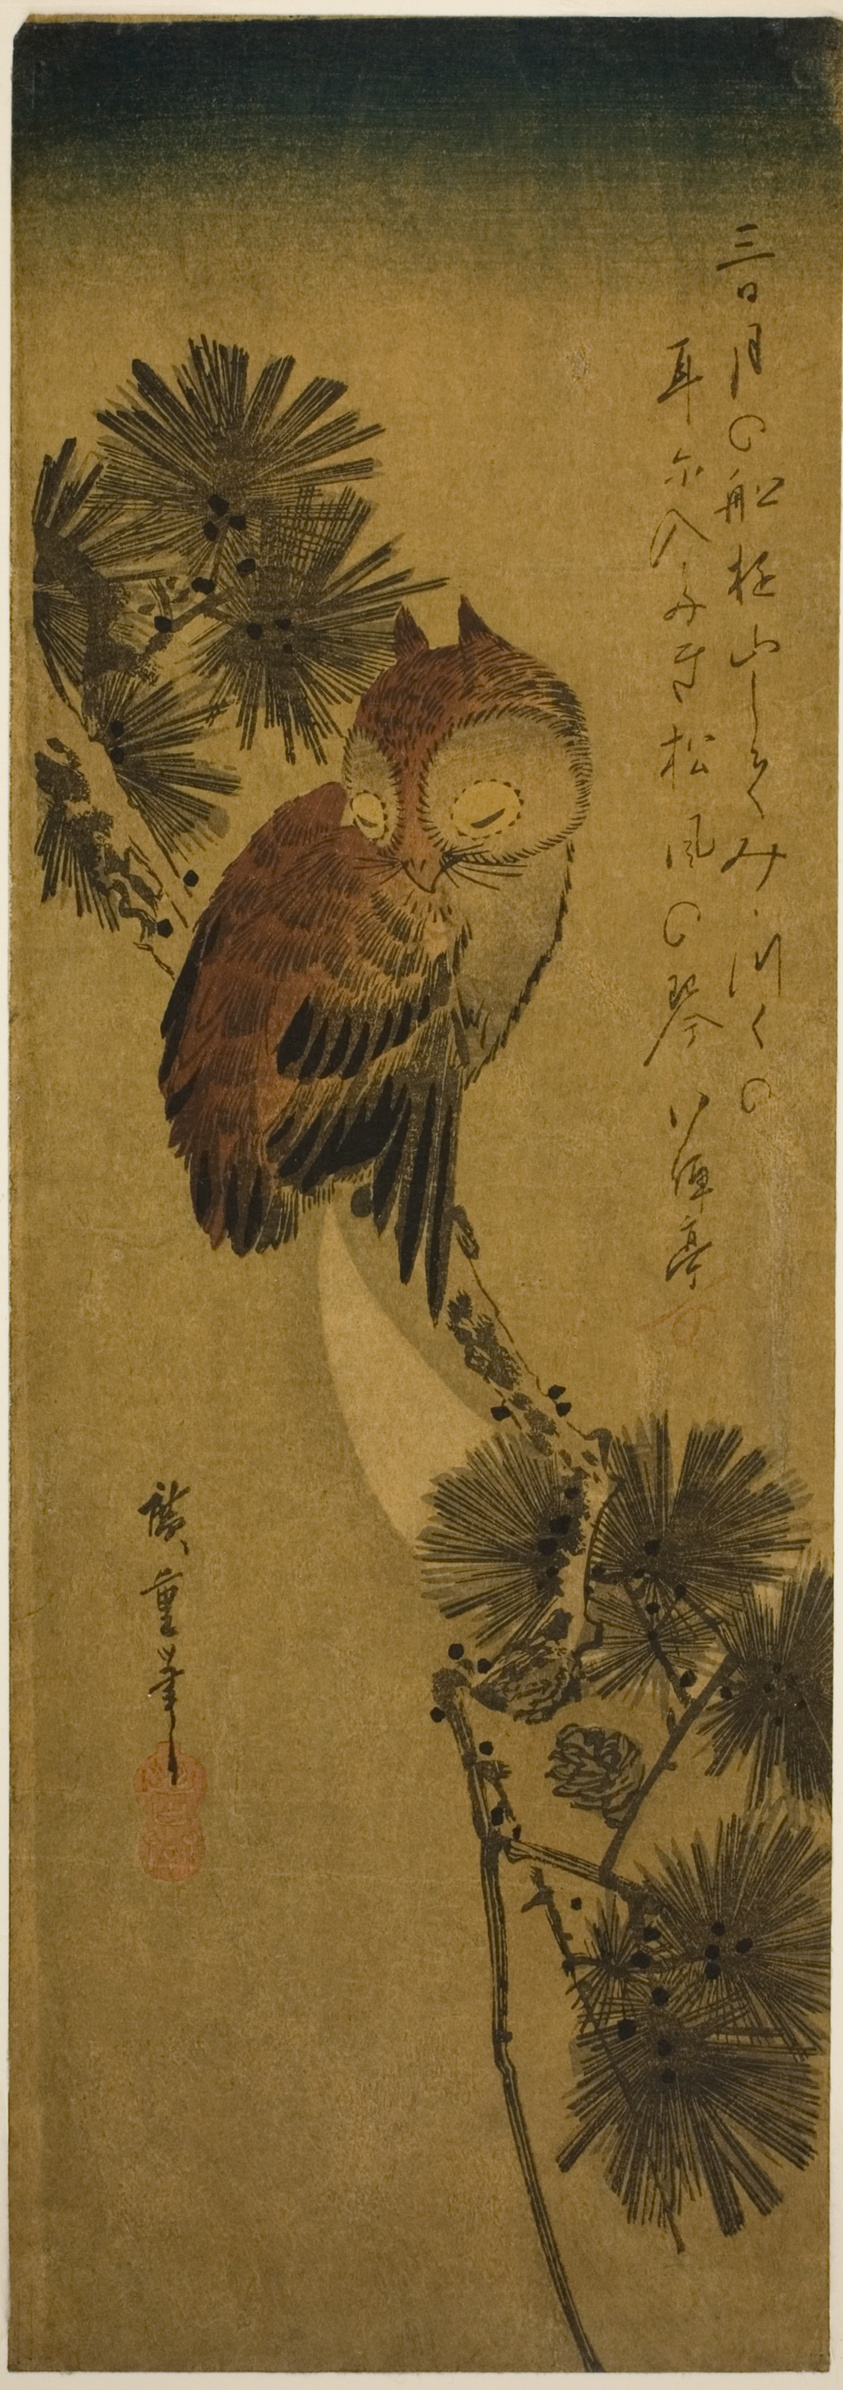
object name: Print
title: Small-horned owl, pine, and crescent moon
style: Japanese (culture or style)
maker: Utagawa Hiroshige 歌川 広重; Japanese, 1797-1858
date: 1830s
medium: Color woodblock print; chutanzaku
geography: Japan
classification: woodblock print; print; asian art